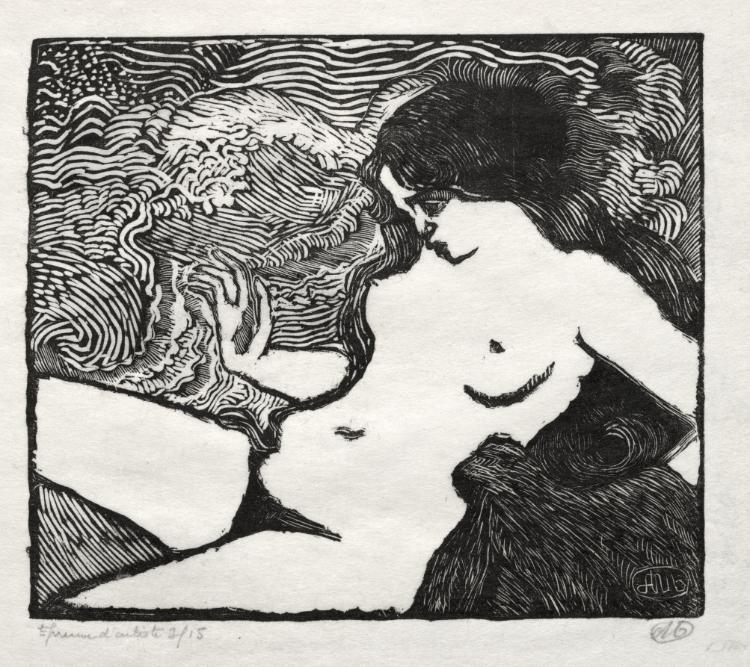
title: Wave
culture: France, late 19th Century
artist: Aristide Maillol (French, 1861–1944)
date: 1895–98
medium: wood engraving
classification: Print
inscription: Inscribed: "Epreuve d'artiste 3/15"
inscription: initialed in pencil with Maillol's monogram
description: The color woodcuts of Katsushika Hokusai were highly esteemed. One of his most famous prints, The Great Wave off Kanagawa (1823-31), is a striking image of an enormous cresting wave. Maillol exploited the curling water motif to achieve an energetic linear design that surrounds and cushions the nude woman but also creates a lively contrast to the large, flat white shape of her body. A precursor to Maillol's future work as a sculptor, Wave reveals the artist's interest in conveying the sensual curves of the female form.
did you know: This print dates from a period when Aristide Maillol used his wife, Clotilde, as his primary model.